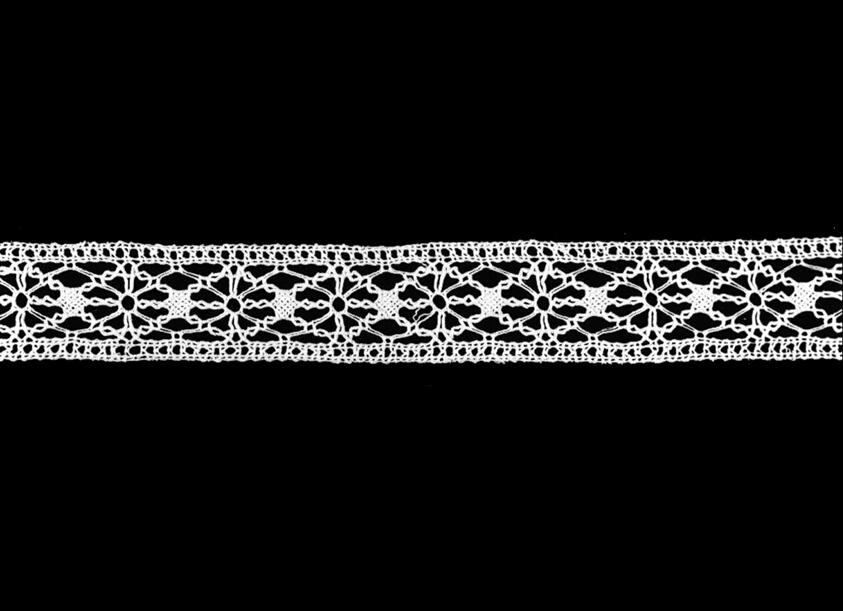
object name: Textile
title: Two Insertions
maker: Italy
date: 17th century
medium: Linen, bobbin straight lace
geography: Italy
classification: textile; lace - bobbin